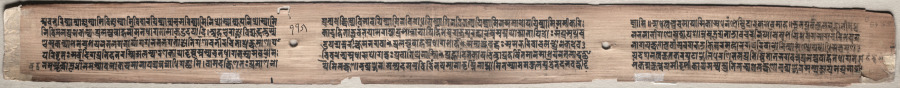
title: Text, folio 115 (verso) from a Gandavyuha-sutra (Manuscript of the Supreme Array)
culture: Nepal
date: 1000–1100s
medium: ink on palm leaf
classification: Painting